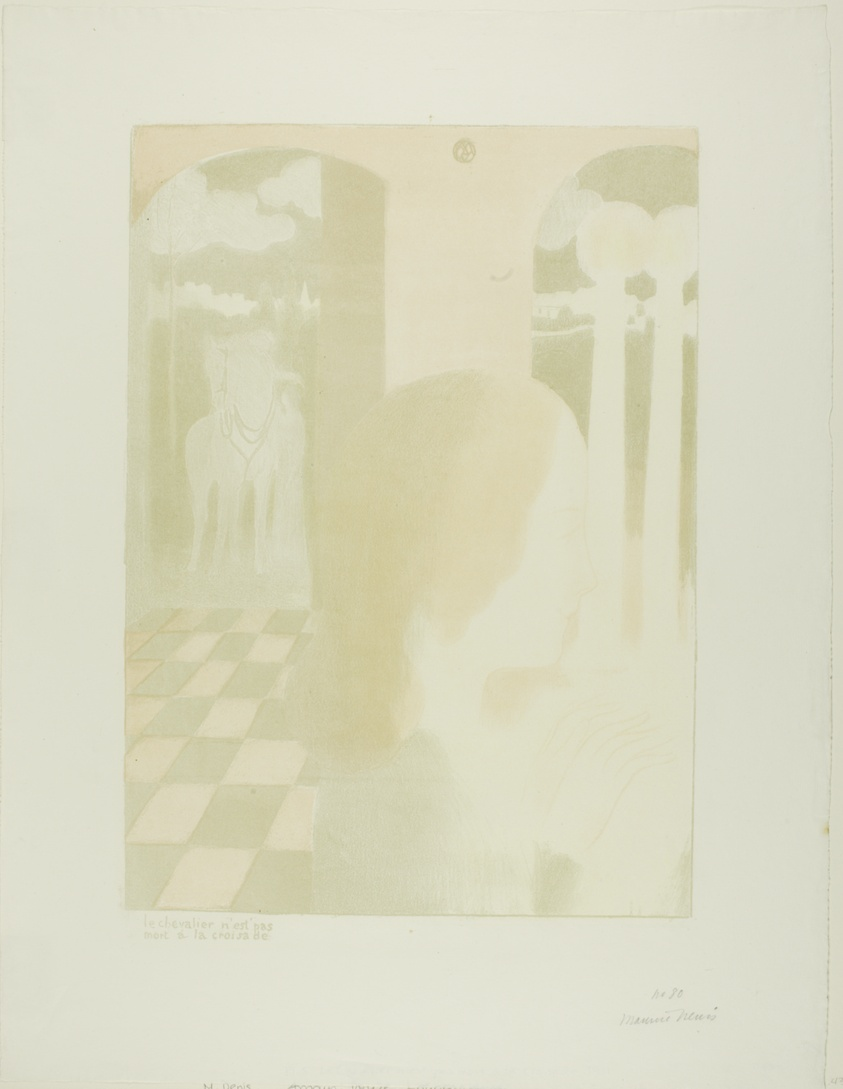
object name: Print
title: The Knight Did Not Die at the Crusade, plate five from Love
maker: Maurice Denis (French, 1870-1943); published by Ambroise Vollard (French, 1867-1939)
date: 1898, published 1899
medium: Lithograph in peach, pale green, and yellow on light ivory wove paper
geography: France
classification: lithograph; print; prints and drawing